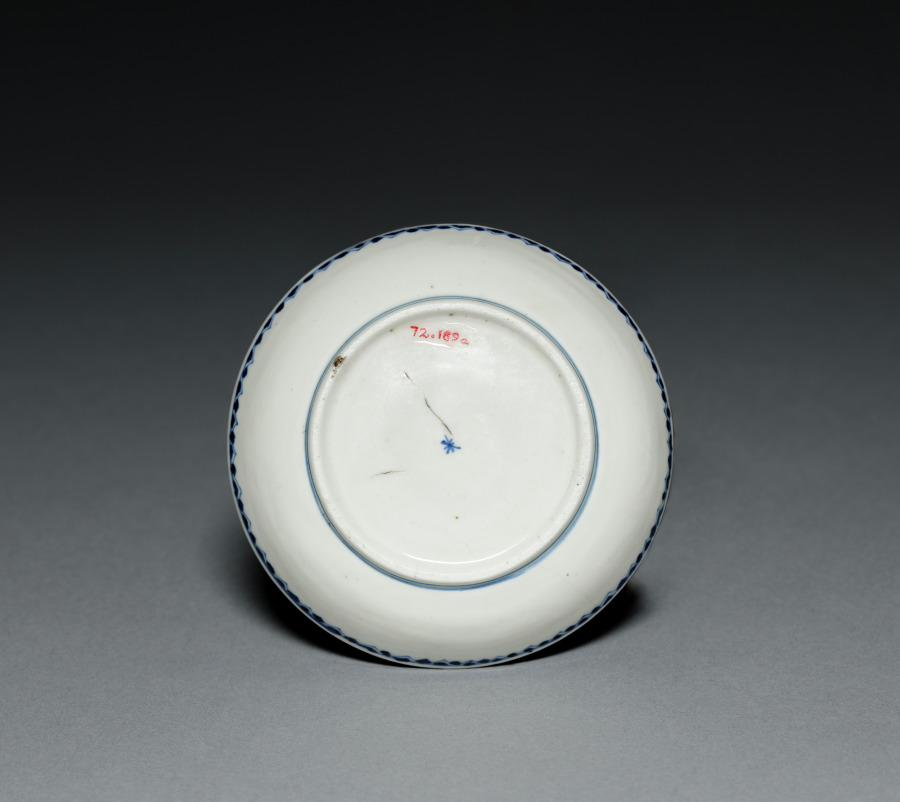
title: Saucer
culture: France, Saint Cloud, 18th century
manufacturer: Saint Cloud Porcelain Factory (French)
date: c. 1720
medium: soft-paste porcelain with underglaze blue decoration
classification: Ceramic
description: The first extensive manufactory of soft-paste porcelain in France was carried out at a factory at Saint-Cloud, near Paris. The earliest porcelains were produced there in 1693, and the factory remained a significant one throughout the first half of the 18th century. Bacause of technical difficulties, most of the wares produced at Saint-Cloud are rather small in size and heavily potted. Stylistic restraint was exercised in both the form and decoration of its wares. Underglaze blue was frequently employed at Saint-Cloud, and pieces of the type resemble closely those attributed to Rouen, leading to the speculation that the two factories were closely related.